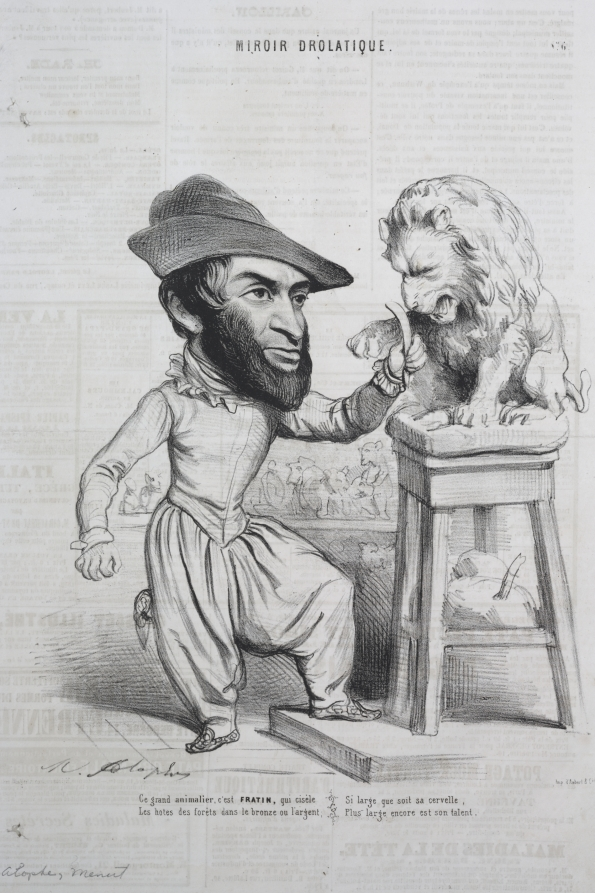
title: Miroir Drolatique: No. 6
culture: France, 19th century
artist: Marie Alexandre Alophe (French, 1812–1883)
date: c. 1842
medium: lithograph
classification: Print